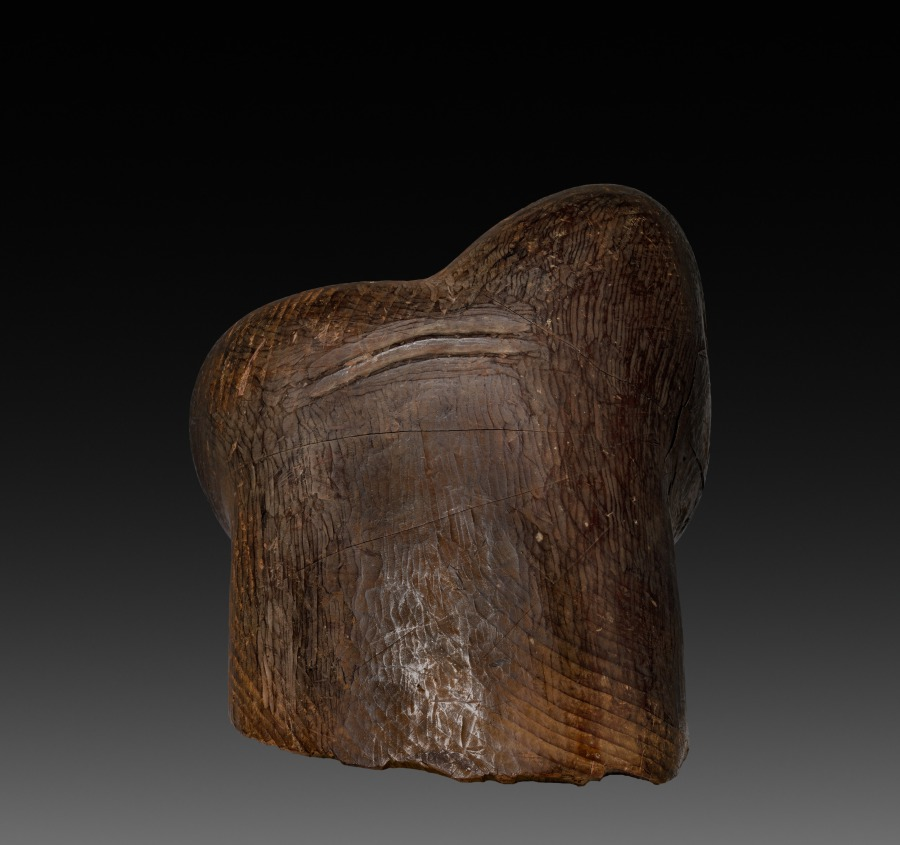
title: Hand of Buddha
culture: Japan, Nara period (710–94)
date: late 700s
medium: wood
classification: Sculpture